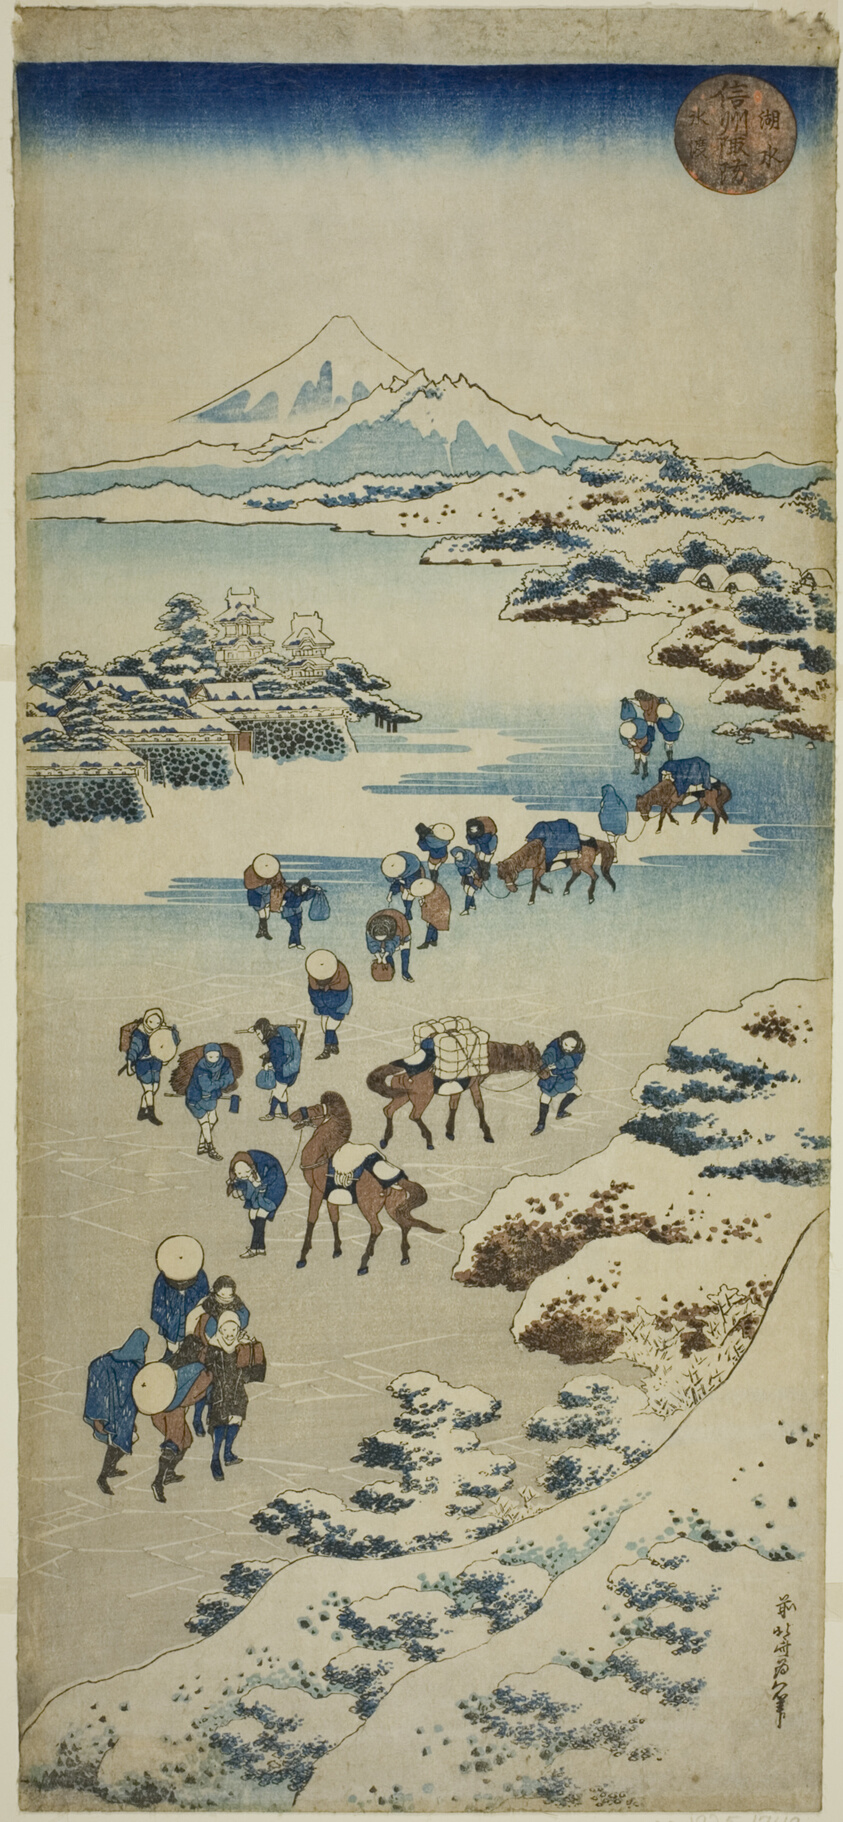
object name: Print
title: Crossing the Frozen Suwa Lake in Shinano Province (Shinshu Suwa kosui kori watari)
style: Japanese (culture or style)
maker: Katsushika Hokusai 葛飾 北斎; Japanese, 1760-1849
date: c. 1833/34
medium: Color woodblock print; vertical nagaban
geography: Japan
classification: woodblock print; print; asian art